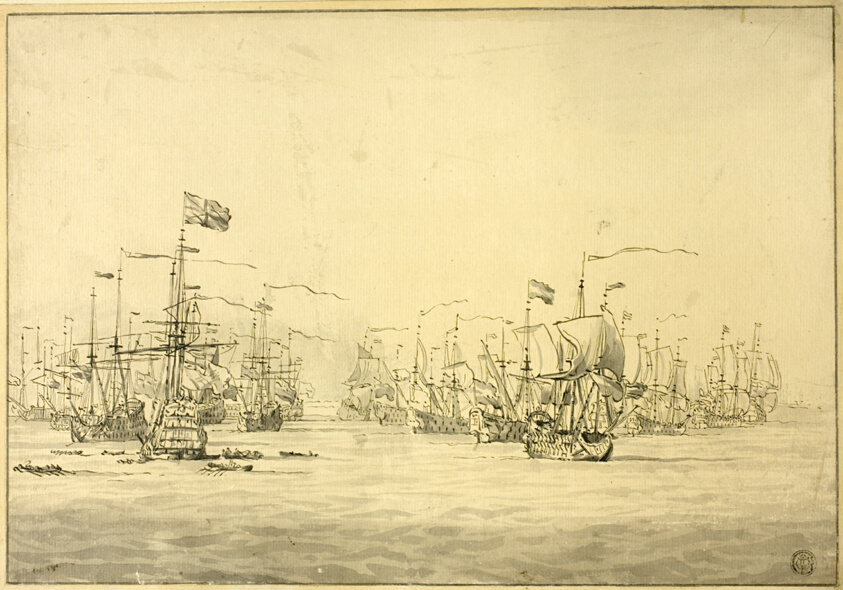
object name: Drawing and Watercolor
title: Dutch and English Fleets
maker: Possibly after Willem van de Velde, II; Dutch, 1633-1707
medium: Pen and black ink, with brush and gray wash, over traces of graphite, on tan laid paper, laid down on card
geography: Holland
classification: pen and ink drawings; drawings (visual works); prints and drawing